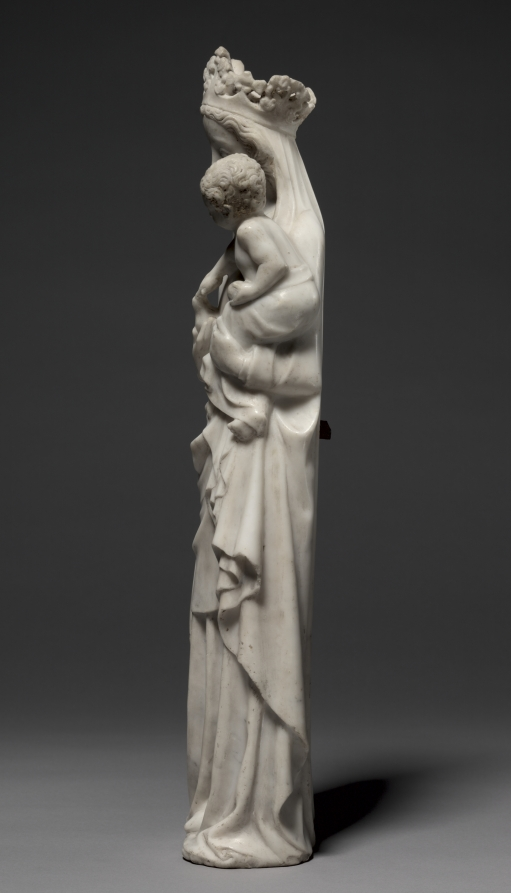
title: Virgin and Child with a Bird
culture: France, Île-de-France, Paris, 14th century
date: c. 1350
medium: marble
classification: Sculpture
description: The Virgin and Child represents one of the most frequent subjects for free-standing sculpture in 14th-century France, motivated by the developing cult of the Virgin and increasing veneration of Mary. Such sculptures were not restricted to churches, but were also found in roadside shrines, entrances to towns, and domestic use in private chapels. The small scale of this statuette suggests it was made for private veneration. The bird, held in the Virgin’s right hand, was a well-known symbol of the human soul and represents Christ’s role as redeemer of humankind.